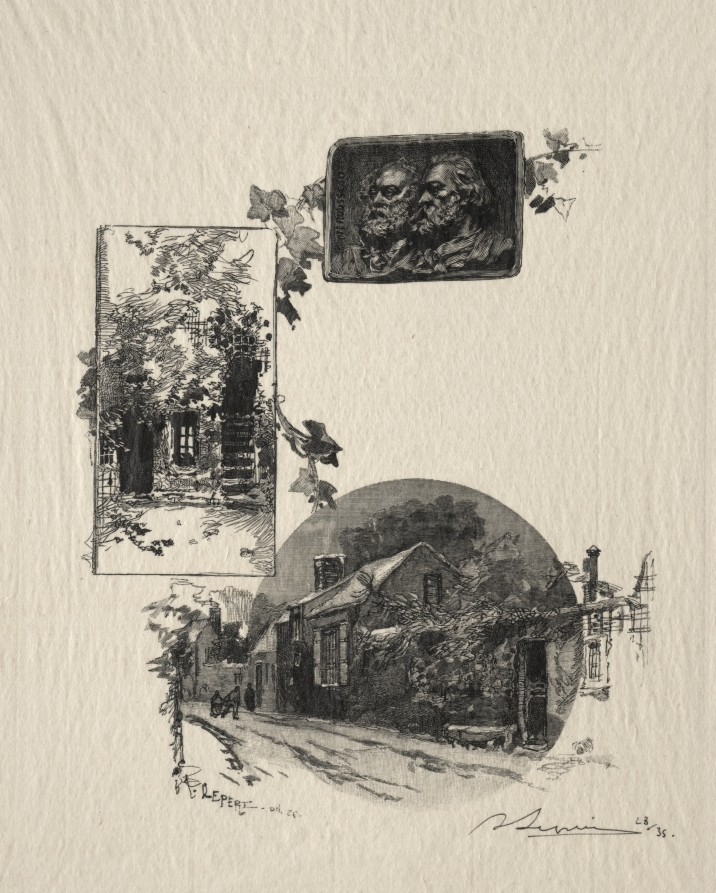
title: Entree de l'atelier Rousseau et la Maison de Millet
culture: France, 19th century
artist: Auguste Louis Lepère (French, 1849–1918)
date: 1887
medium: wood engraving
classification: Print